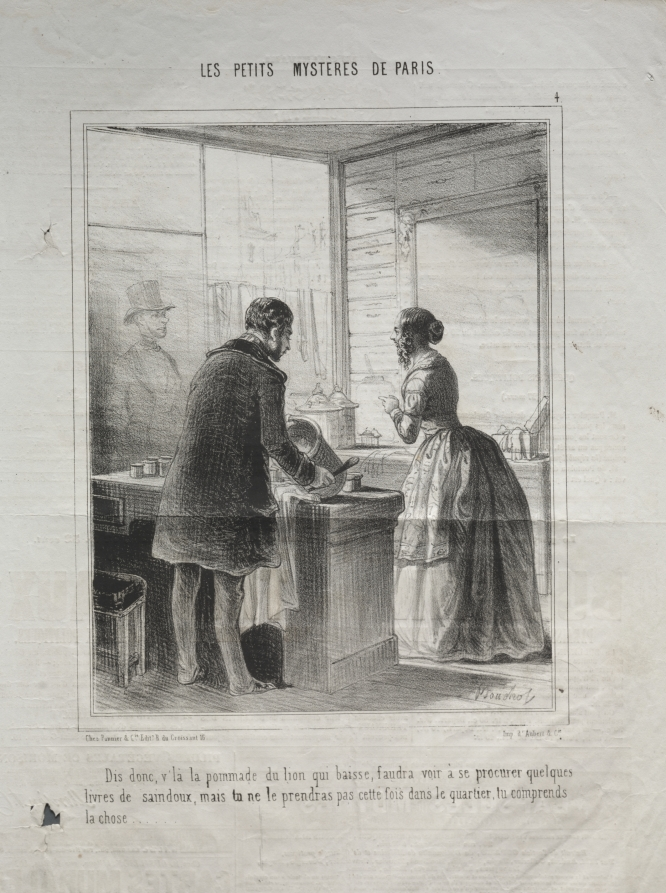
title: Les Petits mystères de Paris: No. 4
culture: France, 19th century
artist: Frédéric Bouchot (French)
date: 1800s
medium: lithograph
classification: Print